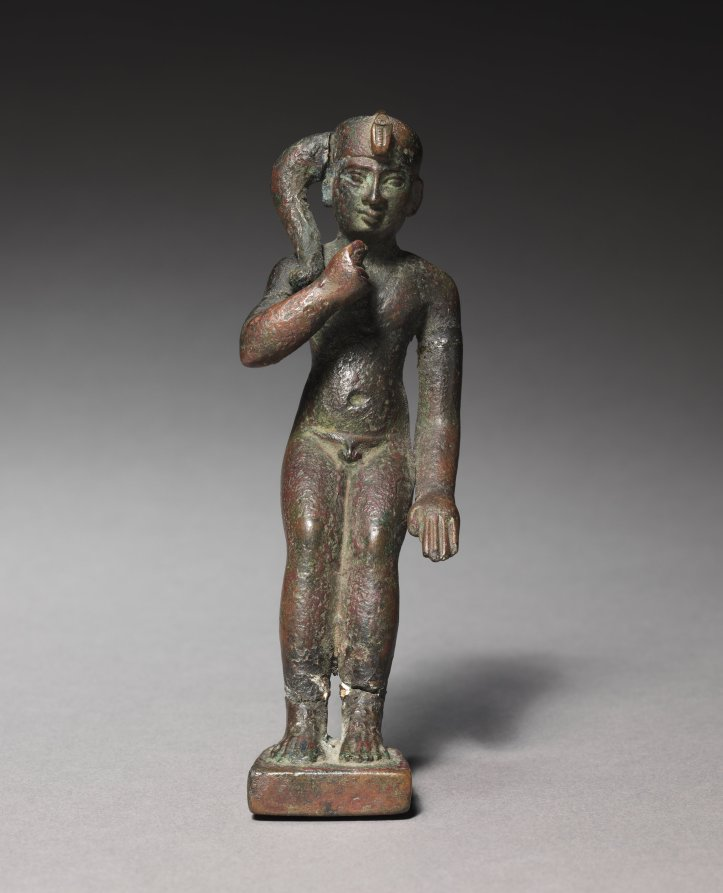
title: Statuette of Harpocrates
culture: Egypt, Greco-Roman period (332 BCE–395 CE), Ptolemaic dynasty (305–30 BCE)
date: 305–30 BCE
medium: bronze, solid cast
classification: Sculpture